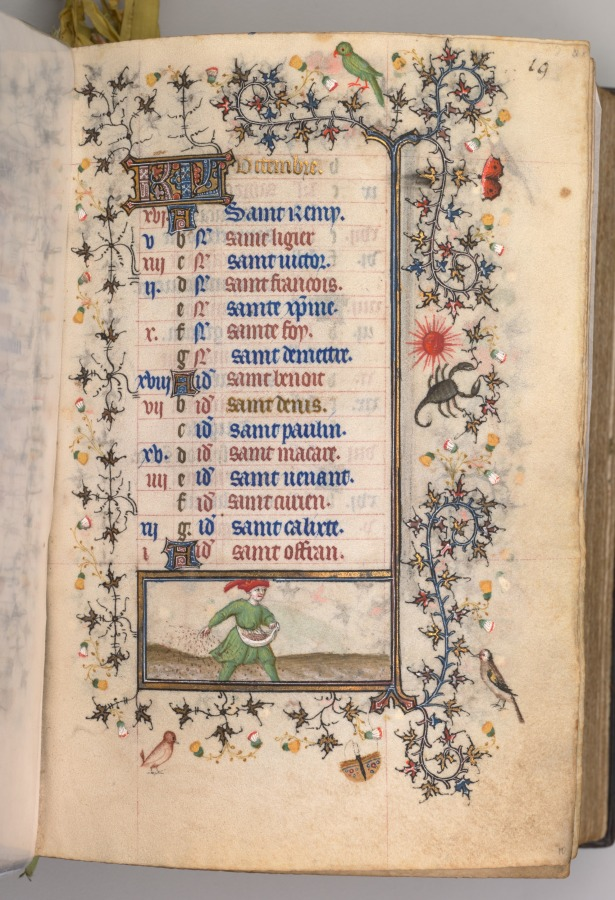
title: Hours of Charles the Noble, King of Navarre (1361-1425): fol. 10r, October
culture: France, Paris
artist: Master of the Brussels Initials and Associates (French)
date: c. 1405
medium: ink, tempera, and gold on vellum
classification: Bound Volume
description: This precious volume was obviously highly prized by its owner, the French-born King of Navarre, who had his coat of arms painted on no less than twenty folios. Rather than directly commissioning this manuscript from a specific workshop, it seems that Charles the Noble acquired his book of hours -- perhaps ready-made for the luxury market -- while on a trip to Paris in 1404-05. A collaborative effort, six painting styles are evidenced within the pages of this codex, those of two Italians, two Frenchmen, and two Netherlanders. The painter who was responsible for the planning and decoration of the book, and who produced seventeen of the large miniatures, was a Bolognese artist known as the Master of the Brussels Initials. His principal assistant, responsible for most of the borders, was a Florentine who signed his name "Zecho" da Firenze on folio 208 verso.